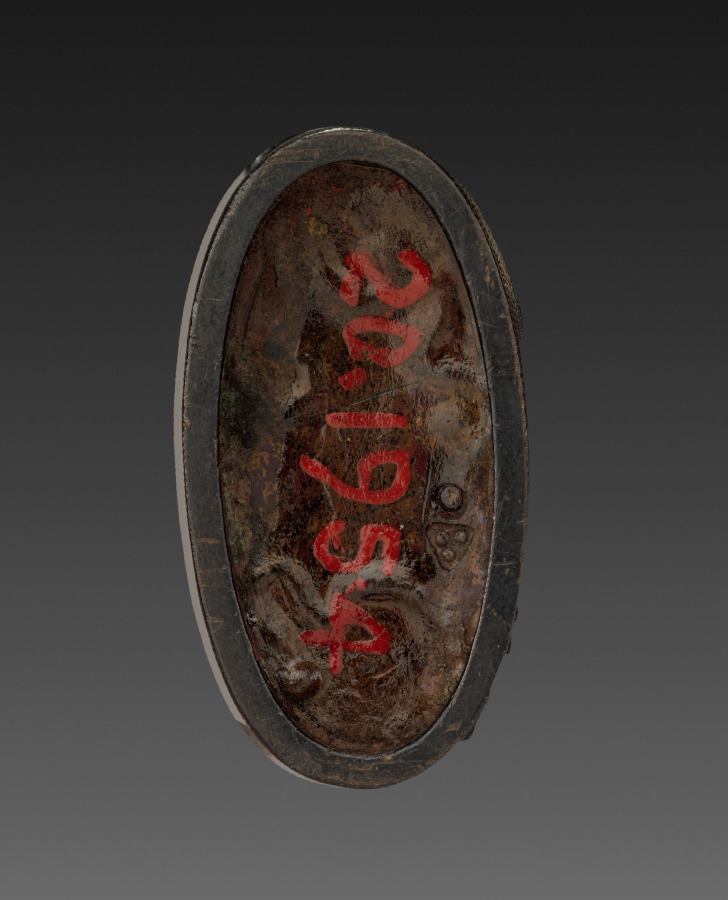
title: Sword-Hilt Pommel (Kashira)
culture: Japan, Edo period (1615–1868)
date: 1700–1850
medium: shakudo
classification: Arms and Armor